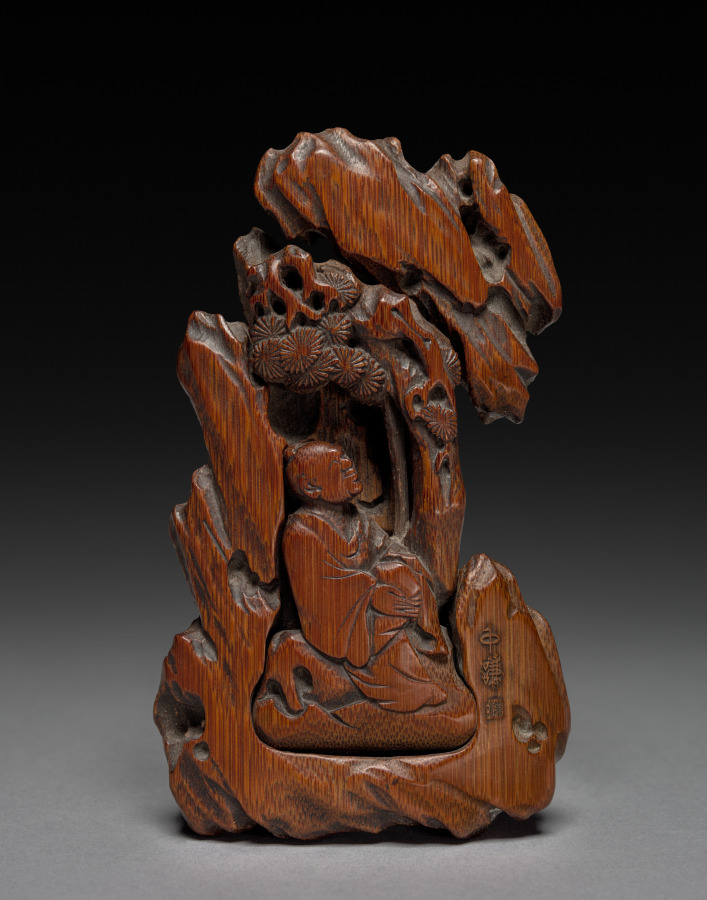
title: Clip for Paper with Sage Seated Under a Pine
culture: China, Ming dynasty (1368–1644)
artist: Pu Zhongqian (Chinese, active 1600s)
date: 1600s or 1700s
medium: carved bamboo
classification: Wood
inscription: signed by the artist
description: In China, access to political power was granted to those who passed the civil service examinations, a system that offered official service only at a high level of education. Chinese literati-officials whose daily routine was administrative work in an office, enjoyed precious objects on their writing desks that offered distraction and demonstrated good taste. By the Ming (1368–1644) and Qing (1644–1911) dynasties, these utensils of the literati studio became also collectibles and were treasured as artworks. Desk objects included paper weights, seals and seal paste boxes, brush rests, wrist rests, brush holders, water droppers, ink cakes, miniature mountains, and albums, all ranging in material from jade, gilt bronze, lacquer, and wood to porcelain.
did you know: Pu Zhongqian was considered a master bamboo carver.